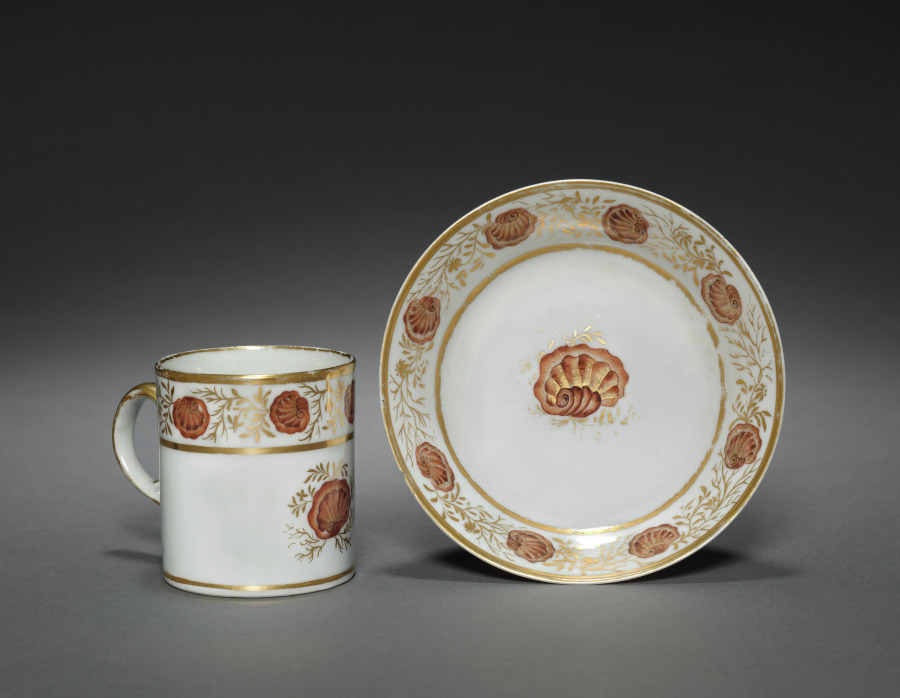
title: Cup and Saucer from Oliver Wolcott, Jr. Tea Service (2 of 6)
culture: Chinese Export porcelain, late 18th-early 19th century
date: 1785–1805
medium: porcelain, sepia enamel, gold leaf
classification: Ceramic